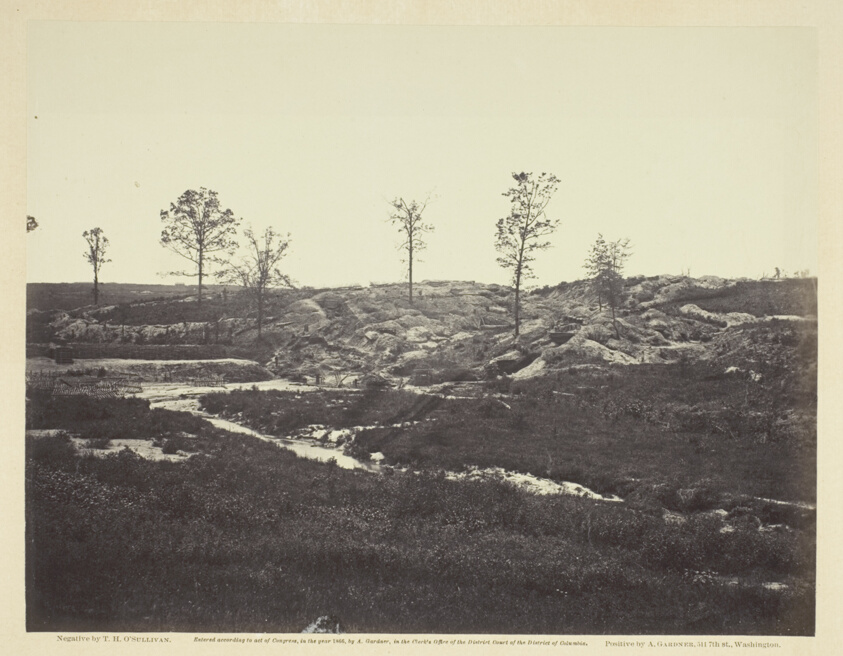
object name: Photograph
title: Interior View of the Confederate Line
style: 19th century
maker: Timothy O'Sullivan (American, born Ireland, 1840–1882)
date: May 1865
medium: Albumen print, pl. 86 from the album "Gardner's Photographic Sketch Book of the War, Volume II" (1866)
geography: United States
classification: photograph; albumen silver print; photography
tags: Collected by Hugh Edwards, Gardner's Photographic Sketch Book